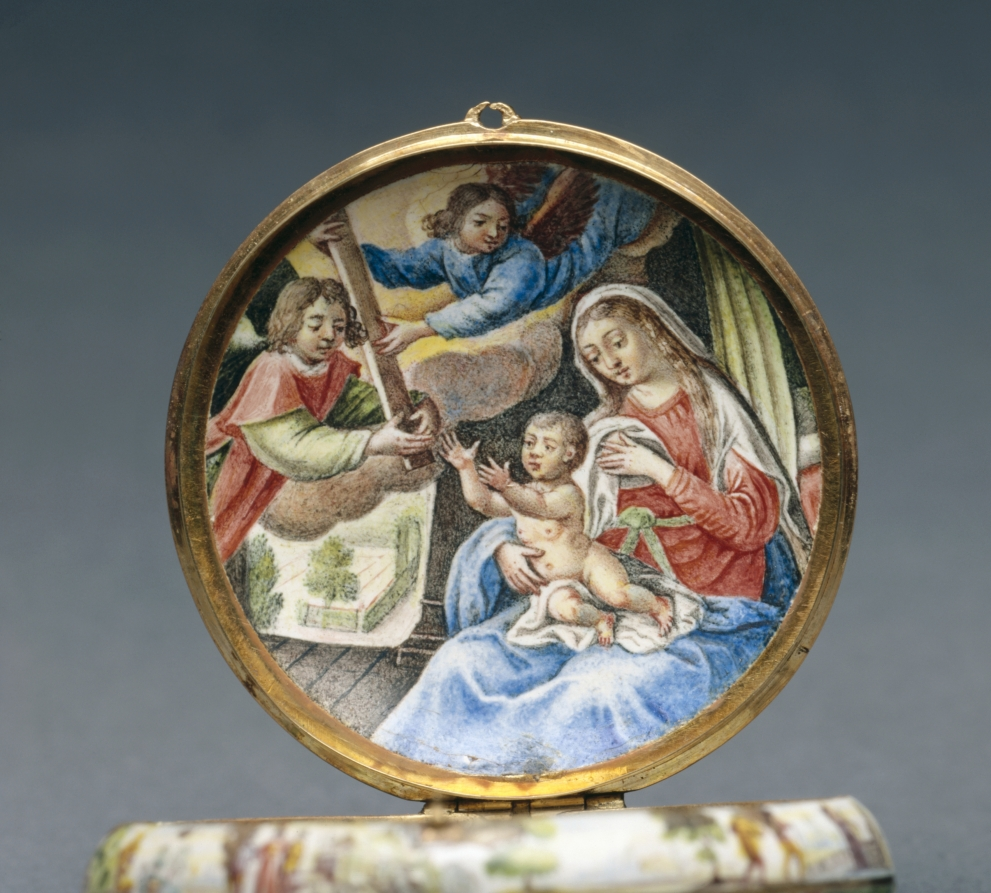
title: Watchcase (Boîtier de montre)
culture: France, 17th century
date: c. 1640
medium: gold and enamel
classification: Jewelry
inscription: [engraved on the rim]: "B8"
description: In the 1630s, the practice of painting with enamel on metal became a means for French miniature painters to achieve a more richly colored, durable product. Previously miniatures were painted with watercolor on vellum, a material made from animal skin. This case would have originally held a watch, but was later transformed into a simple box through the removal of the watch mechanism and ring. This watch case is richly painted inside and out with miniatures modeled after well-known religiously allegorical works.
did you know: Inspiration for the box’s miniatures was drawn from works by Peter Paul Rubens’ The Holy Family with Saints John the Baptist and Elizabeth (1615) (back panel) and Nicolas Cochin (interior base).